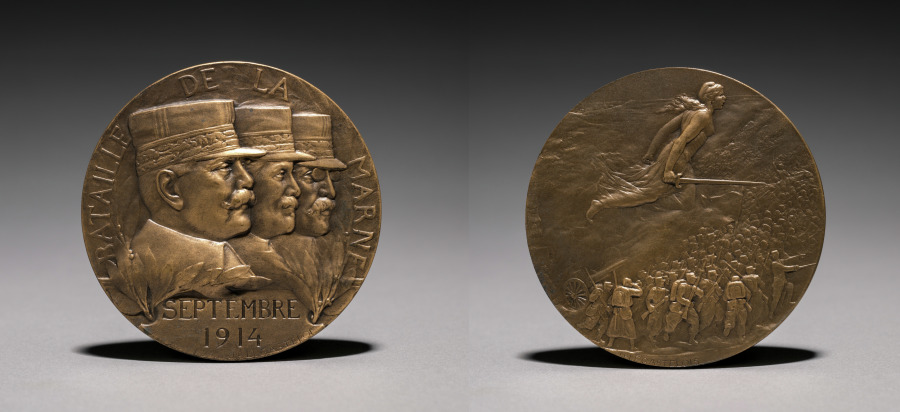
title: Medal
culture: France, 20th century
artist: Jules Prosper Legastelois (French, 1855–1931)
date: 1914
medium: bronze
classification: Metalwork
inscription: Bataille de la Marne September, 1914.